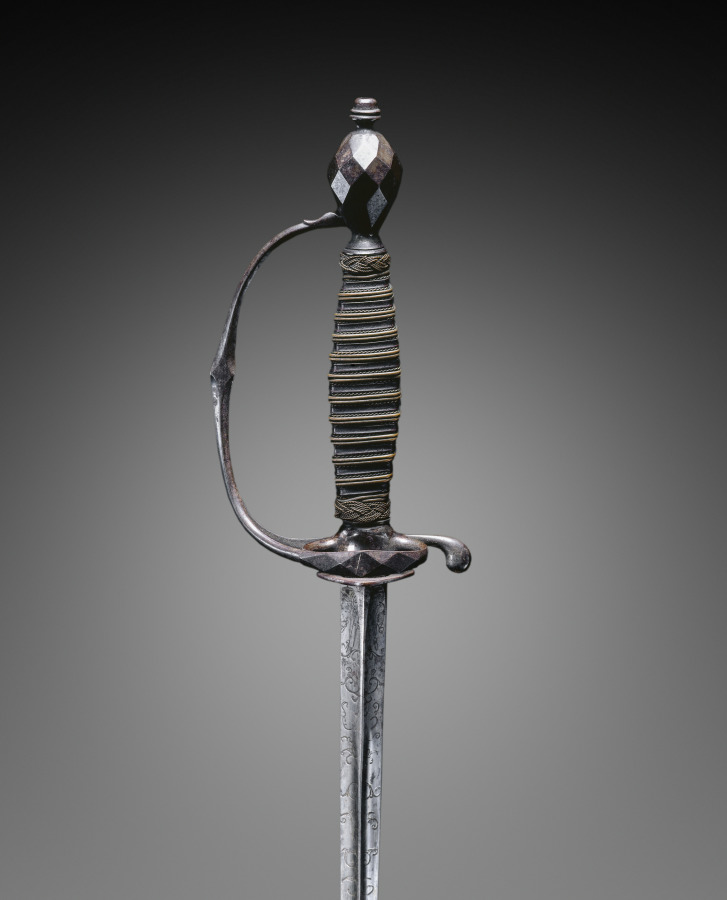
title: Small Sword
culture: Italy (?), early 18th Century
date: c. 1700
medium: steel, wood, copper wire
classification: Arms and Armor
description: During the 1700s, the small-sword emerged as a light, quick weapon. Like the rapier it was carried by unarmored civilians, the noblemen of the upper classes. Over time this delicate sword became more an accessory of male attire than a weapon essential to life and death. The sword hilt, which shows even when the blade is sheathed, became the ground for elaborate decoration. These small-swords thus represent the final stage in the evolution of the sword, from the edged weapons of antiquity to the elegantly refined blades of the 1700s and 1800s.